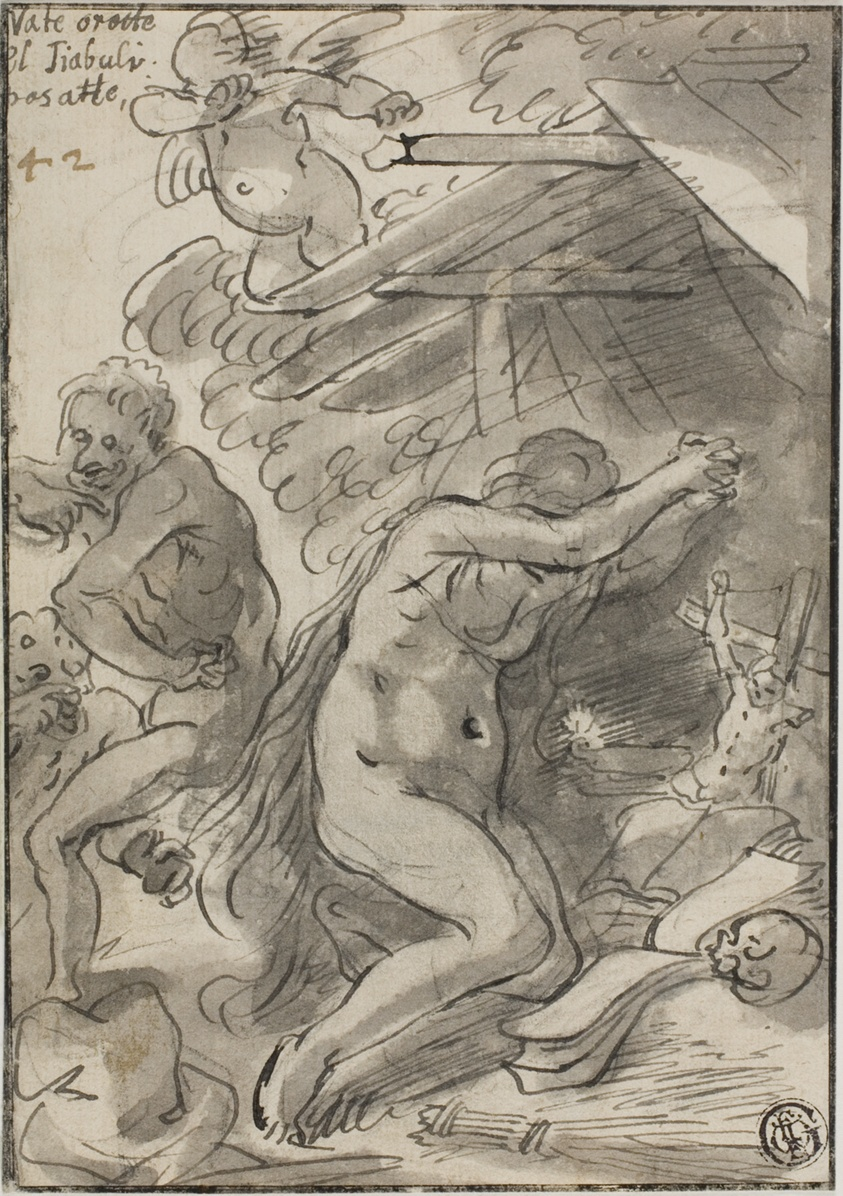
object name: Drawing and Watercolor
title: Mary Magdalene in Wilderness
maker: Unknown Artist; Flemish, 17th century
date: 17th century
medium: Pen and black ink, with brush and gray wash, over graphite, on ivory laid paper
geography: Flanders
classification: ink or chalk wash; drawings (visual works); prints and drawing